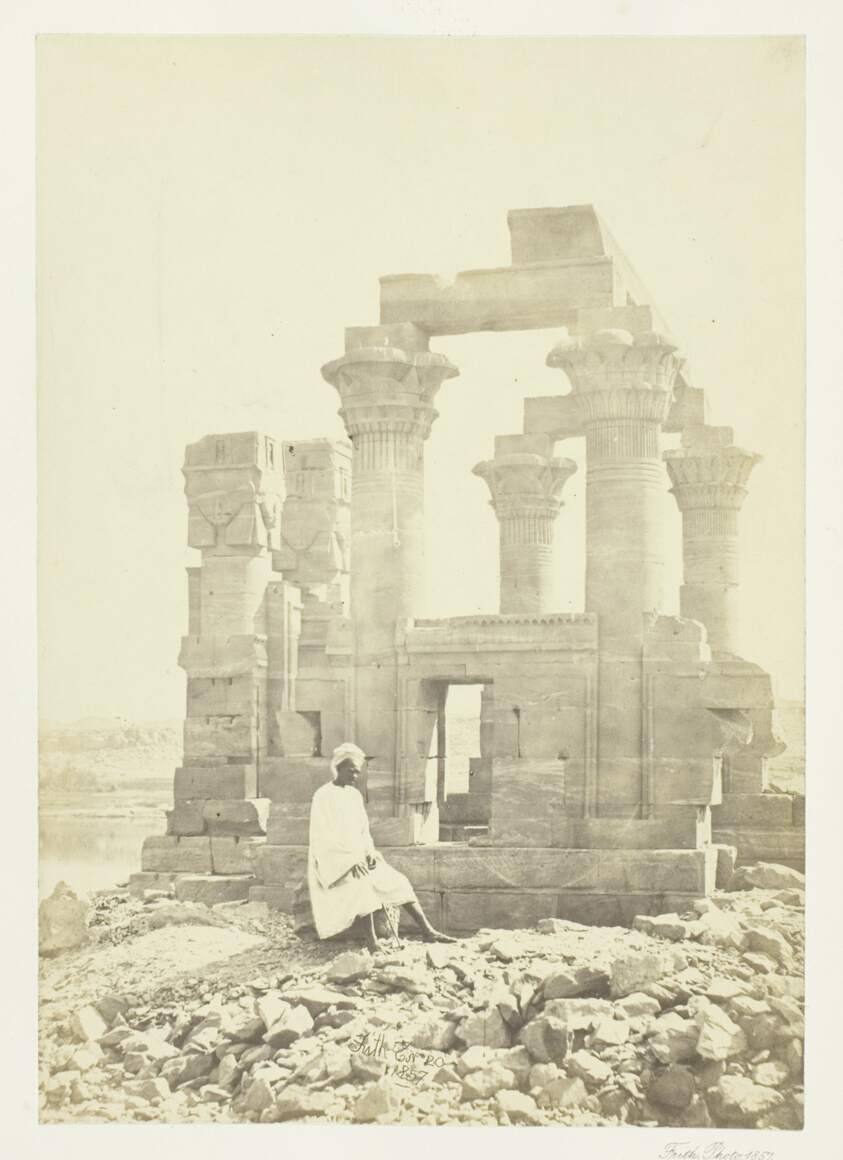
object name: Photograph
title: Early Morning at Wady Kardassy, Nubia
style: 19th century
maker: Francis Frith (English, 1822–1898)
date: 1857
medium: Albumen print, pl. 39 from the album "Egypt and Palestine, Volume II" (1858/60)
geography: England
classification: albumen silver print; photographic process; photography; photograph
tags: Collected by Hugh Edwards, Egypt and Palestine